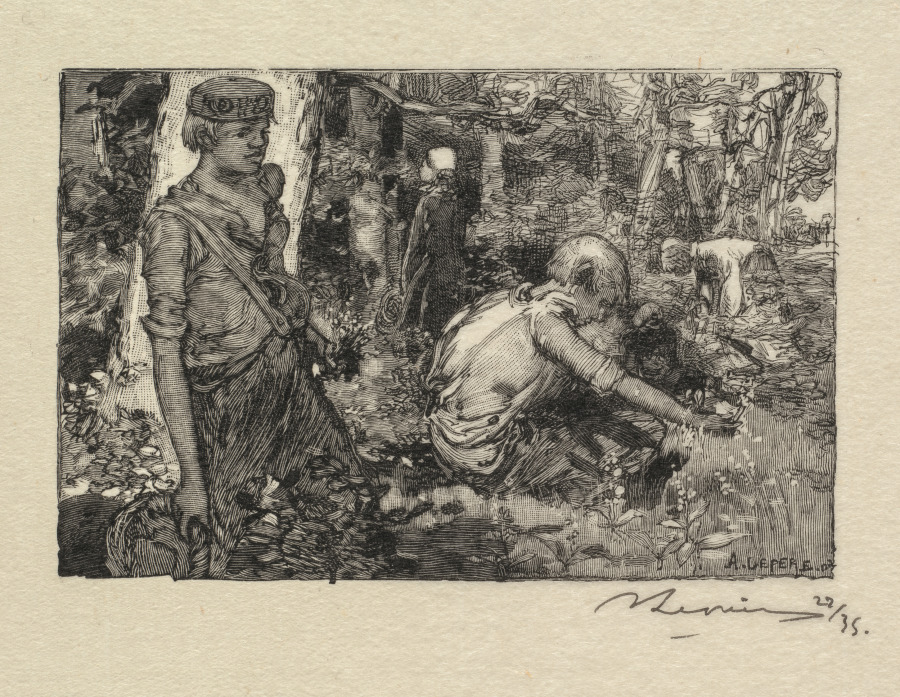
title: Fontainebleau Forest: Gatherine Lily-of-the-Valley (La Forêt de Fontainebleau: La Cueillette du Muguet)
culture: France, 19th century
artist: Auguste Louis Lepère (French, 1849–1918)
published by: A. Desmoulins, Published in Revue Illustrée, 1887–90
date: 1890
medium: wood engraving from bound volume of 34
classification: Bound Volume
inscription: In block, lower right: A. LEPERE. del.; below image, lower right, in black ink: ALepère 22/35; on window mat, lower right, in graphite: Cueillette du muguet